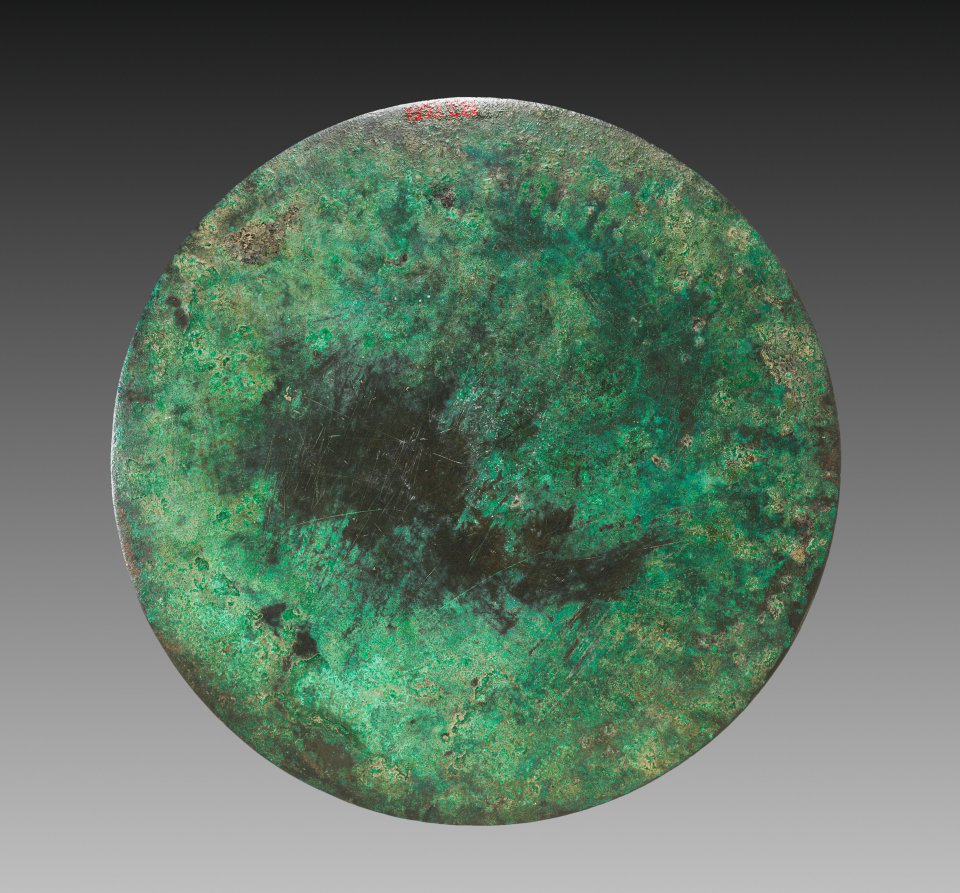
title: Mirror with Lotus and Mantra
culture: China, Yuan dynasty (1271-1368)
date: 1271–1368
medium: bronze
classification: Metalwork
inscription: "In the name of Om mani padme hum."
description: This mirror features intricate Buddhist designs. Around the central knob are four leaves, a ring of tiny beads, and then a circle made up of small lotus flower designs. Outside of that are eight big petal shapes, inside each is a Sanskrit letter. The mirror has the phrase "In the name of Om mani padme hum" written in a slightly incorrect form of Sanskrit, possibly because the Chinese mirror maker was not familiar with the language.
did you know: A mantra, or meditative statement, is embedded in the petals of the lotus flower on the mirror's back.